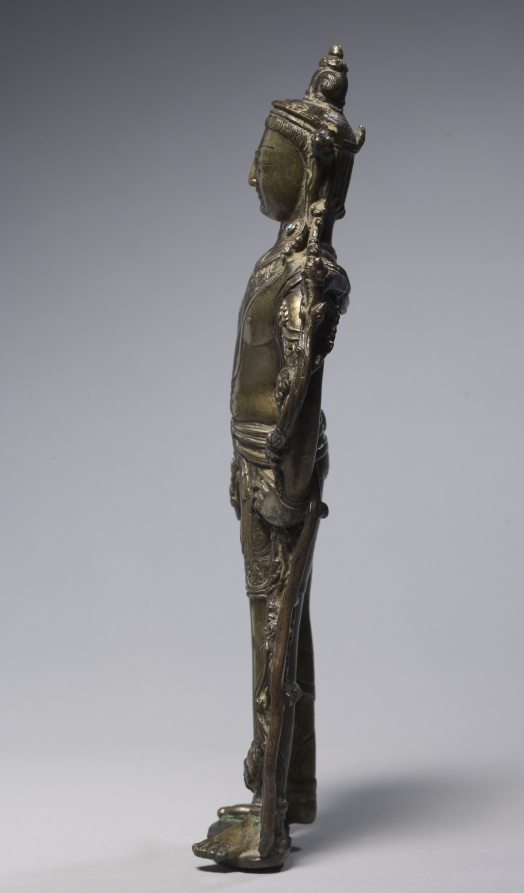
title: Bodhisattva Padmapani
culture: Western Tibet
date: 900s–1000s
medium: brass inlaid with silver and gold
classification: Sculpture